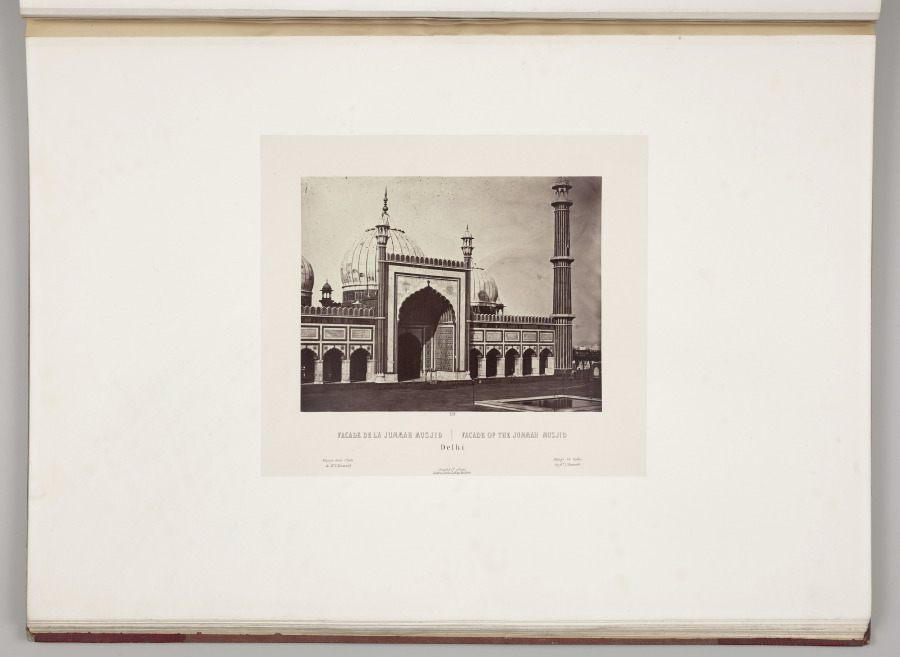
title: Facade of the Jummah Musjid, Delhi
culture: France, 19th century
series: India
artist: Louis-Théophile Marie Rousselet (French, 1845–1929)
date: 1865–68, published 1869–70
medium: Albumen print from glass plate negative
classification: Photograph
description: Concerned that his drawings did not do justice to the splendor of India’s monuments, Rousselet learned photography in India that year, a remarkable accomplishment. He proved to be a talented photographer with a sophisticated sense of composition. The scenes in this volume sweep across sites of Sultanate, Rajput, and Mughal power in northern India, from the sacred Hindu city of Varanasi on the Ganges River to Alwar in Rajasthan. Also included are several scenes of industry and portraits of Indian rulers.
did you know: Louis Rousselet described himself as a “scientific traveler” when he went to India alone at age 18 in 1863 and stayed into 1868.